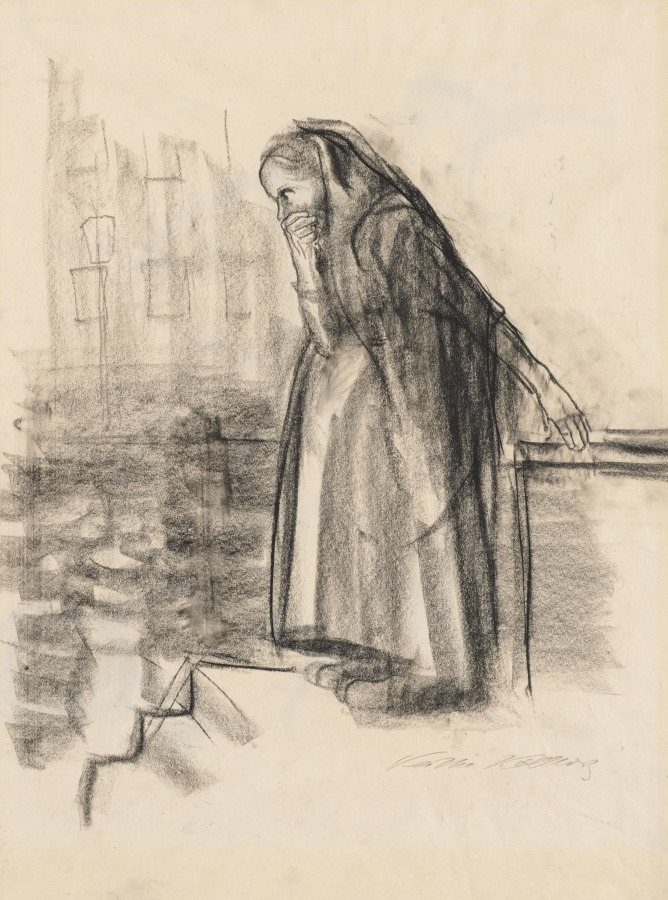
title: Pregnant Woman Contemplating Suicide (recto) Three Studies of a Child (verso)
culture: Germany, 20th century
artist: Käthe Kollwitz (German, 1867–1945)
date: c. 1926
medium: black chalk or charcoal? (rubbed in places)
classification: Drawing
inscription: signed, lower right, in graphite: Kathe Kollwitz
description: Working in a frank but emotional naturalistic style far different from that of her contemporaries, Käthe Kollwitz depicted a pregnant woman who stands as a universal symbol of human grief. Just a few bold strokes of crayon relay the woman’s despair. After World War I, Kollwitz’s work focused on the sorrows of those left behind: the children, widows, and mothers who underwent loss, physical neglect, and economic hardship. Her focus on grief and despair in this and other works emerged especially after her youngest son, Peter, was killed in the first months of the war.